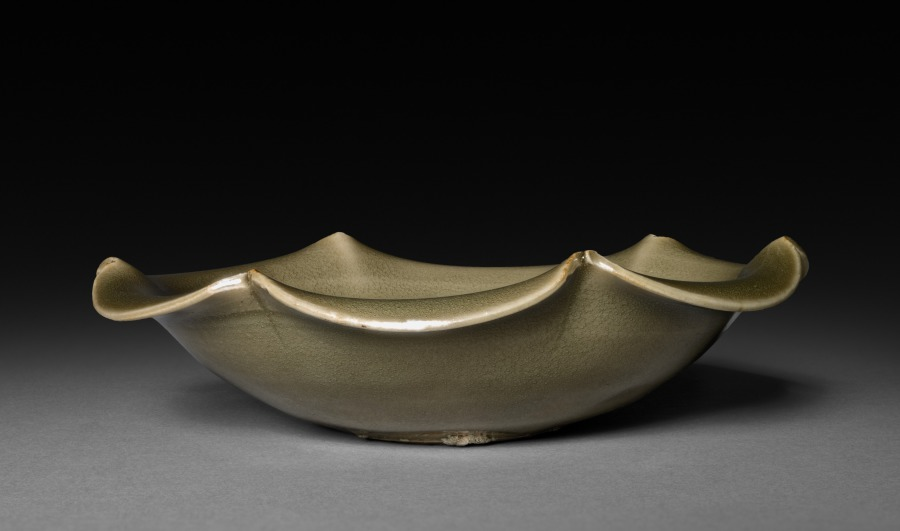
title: Foliated Saucer: Yaozhou Ware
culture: China, Shaanxi province, Northern Song dynasty (960-1127)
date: late 1000s-early 1100s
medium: glazed porcelain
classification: Ceramic